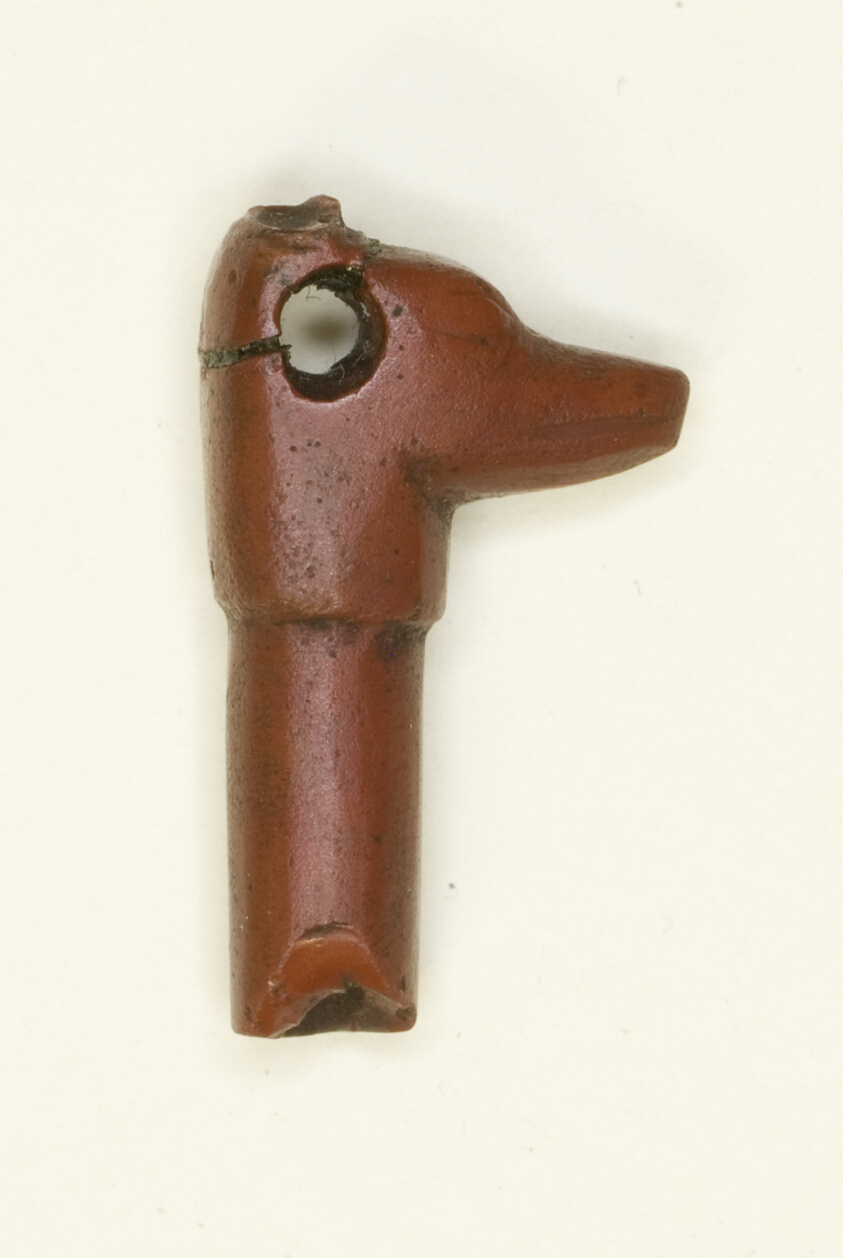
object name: Costume and Accessories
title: Amulet of the Head of the God Anubis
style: egyptian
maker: Egyptian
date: New Kingdom–Late Period (about 1550–664 BCE)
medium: Jasper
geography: Egypt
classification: amulet; jewelry; stone; ancient art; costume